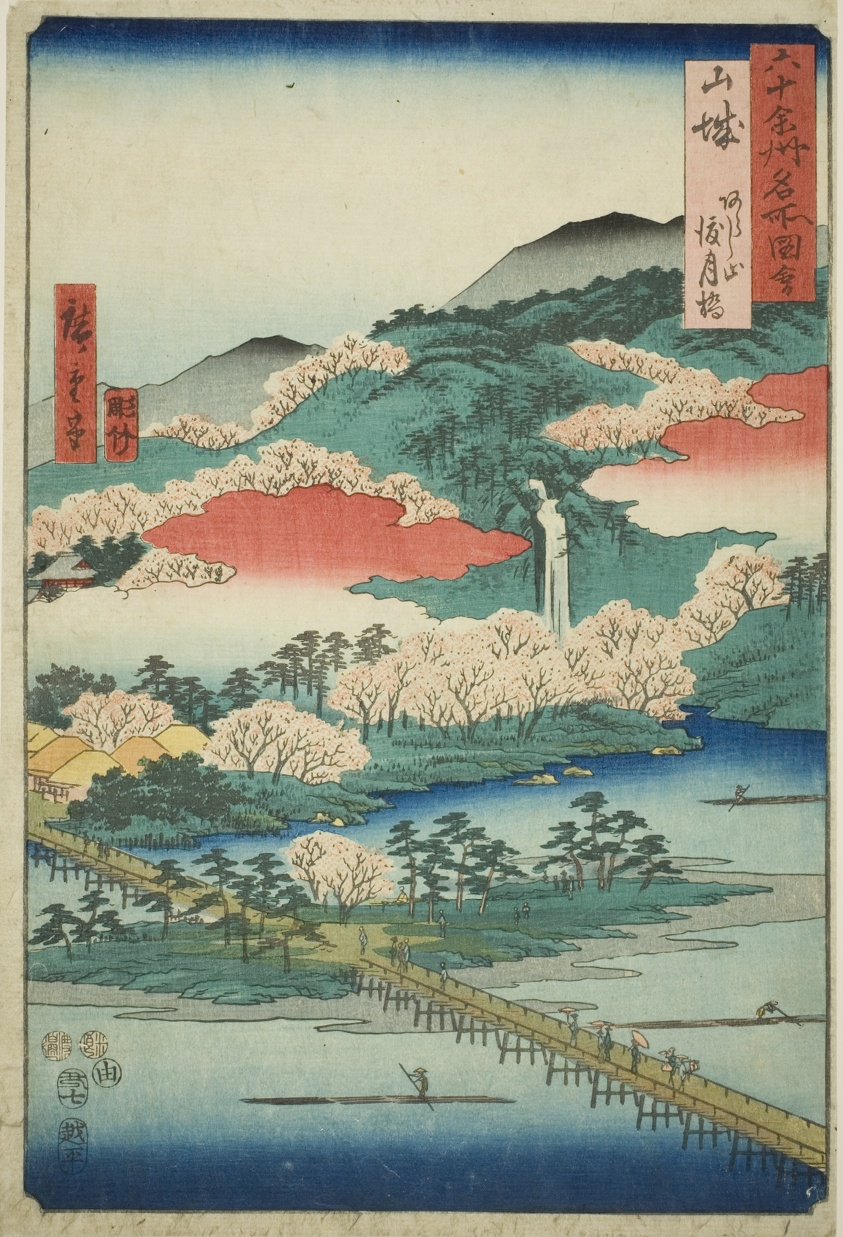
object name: Print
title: Yamashiro Province: The Togetsu Bridge in Mount Arashi (Yamashiro, Arashiyama Togetsukyo), from the series "Famous Places in the Sixty-odd Provinces (Rokujuyoshu meisho zue)"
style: Japanese (culture or style)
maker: Utagawa Hiroshige 歌川 広重; Japanese, 1797-1858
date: 1853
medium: Color woodblock print; oban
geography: Japan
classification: woodblock print; print; asian art